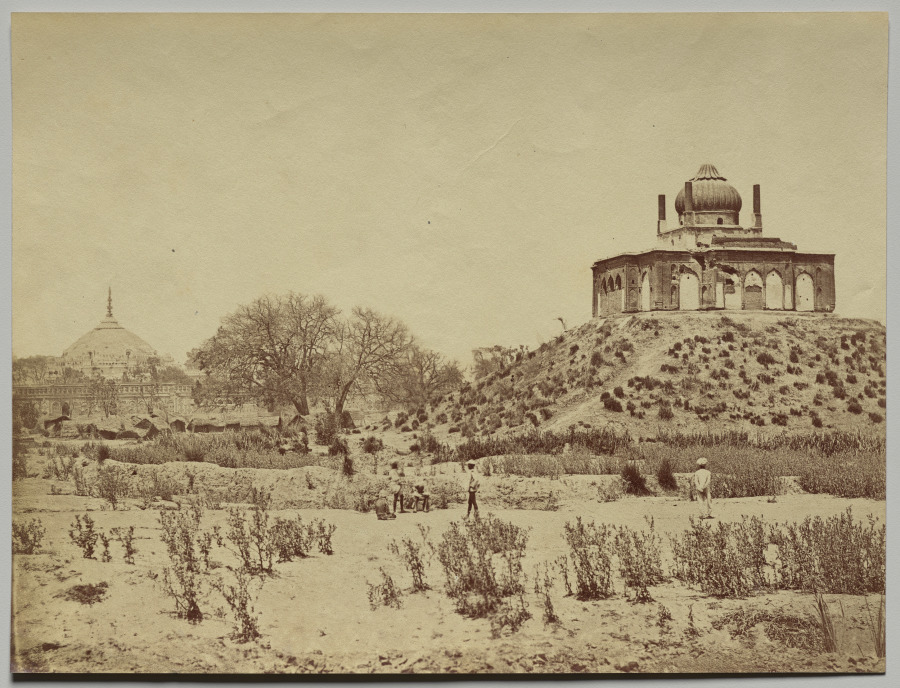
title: The Kudmsee Russol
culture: England, 19th century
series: Lucknow After the Siege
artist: Felice A. Beato (British, 1832–1909)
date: 1858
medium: albumen print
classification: Photograph